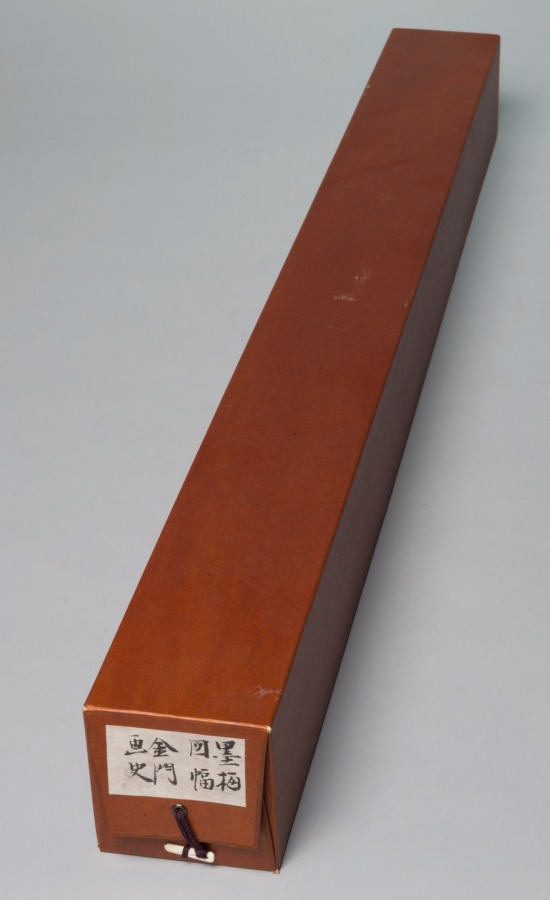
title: Prunus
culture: Japan, Edo period (1615–1868)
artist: attributed to Kano Einō (Japanese, 1631–1697)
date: mid- to late 1600s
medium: hanging scroll; ink on paper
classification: Painting